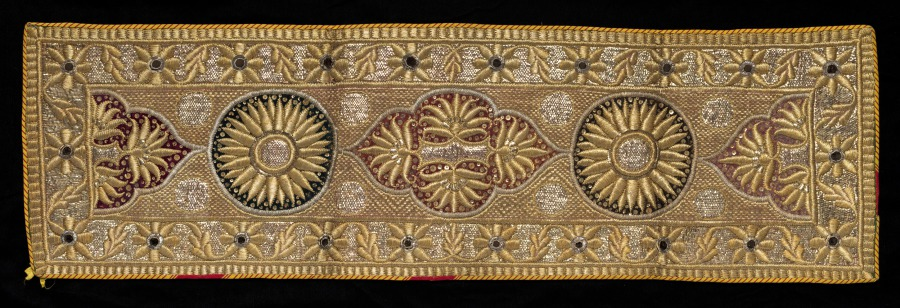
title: Embroidered Strip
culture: India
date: early 1900s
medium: embroidery; cotton, metal and silk thread, sequins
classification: Embroidery